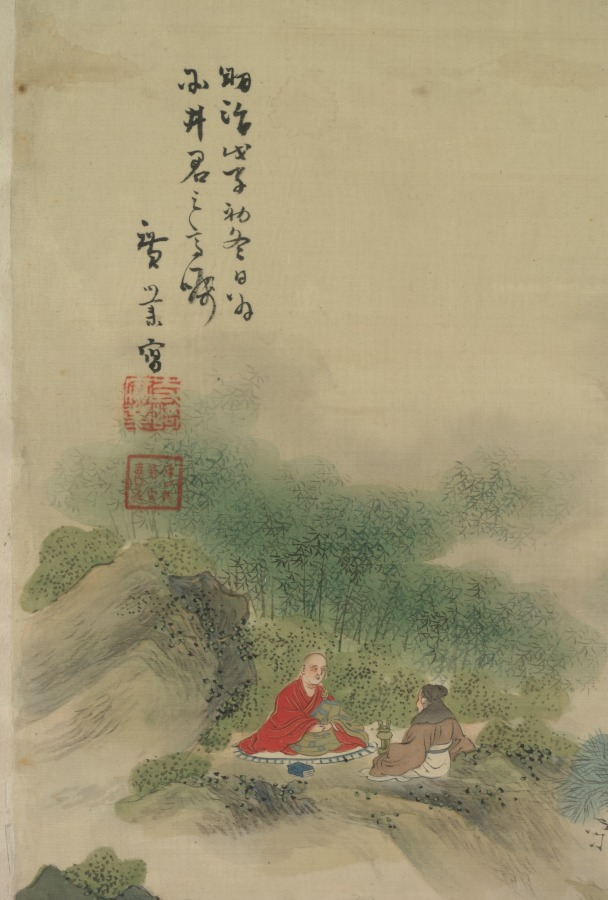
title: Chinese Sages in a Garden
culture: Japan, Meiji period (1868–1912)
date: 1888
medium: ink and color on silk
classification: Painting